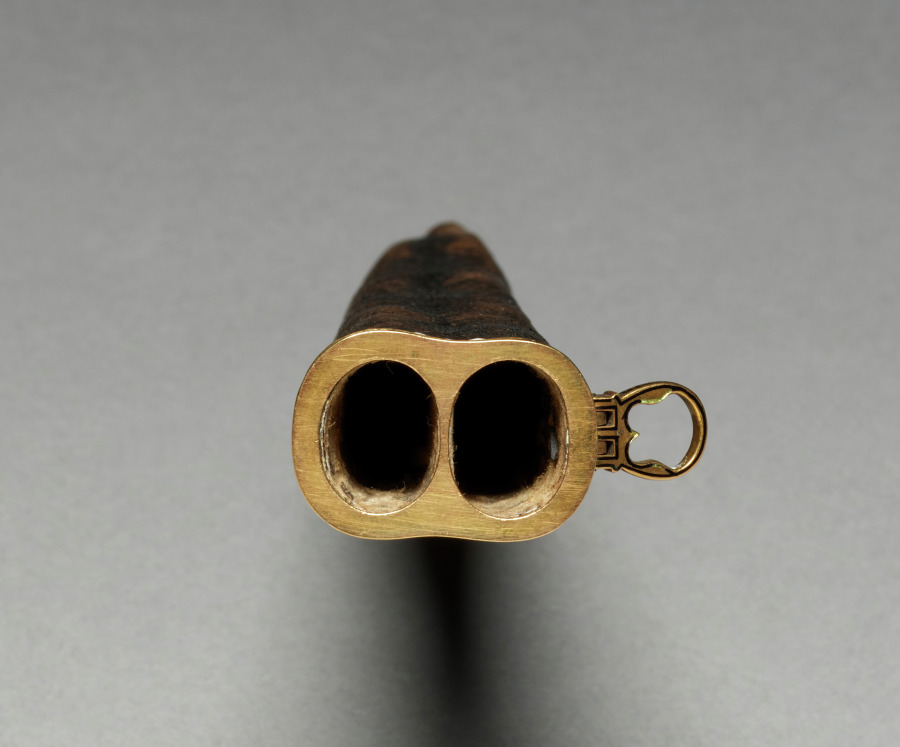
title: Knife and Fork with Sheath (Sheath)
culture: Italy, Venice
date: late 1500s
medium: gold, enamel, crystal, steel, leather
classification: Enamel